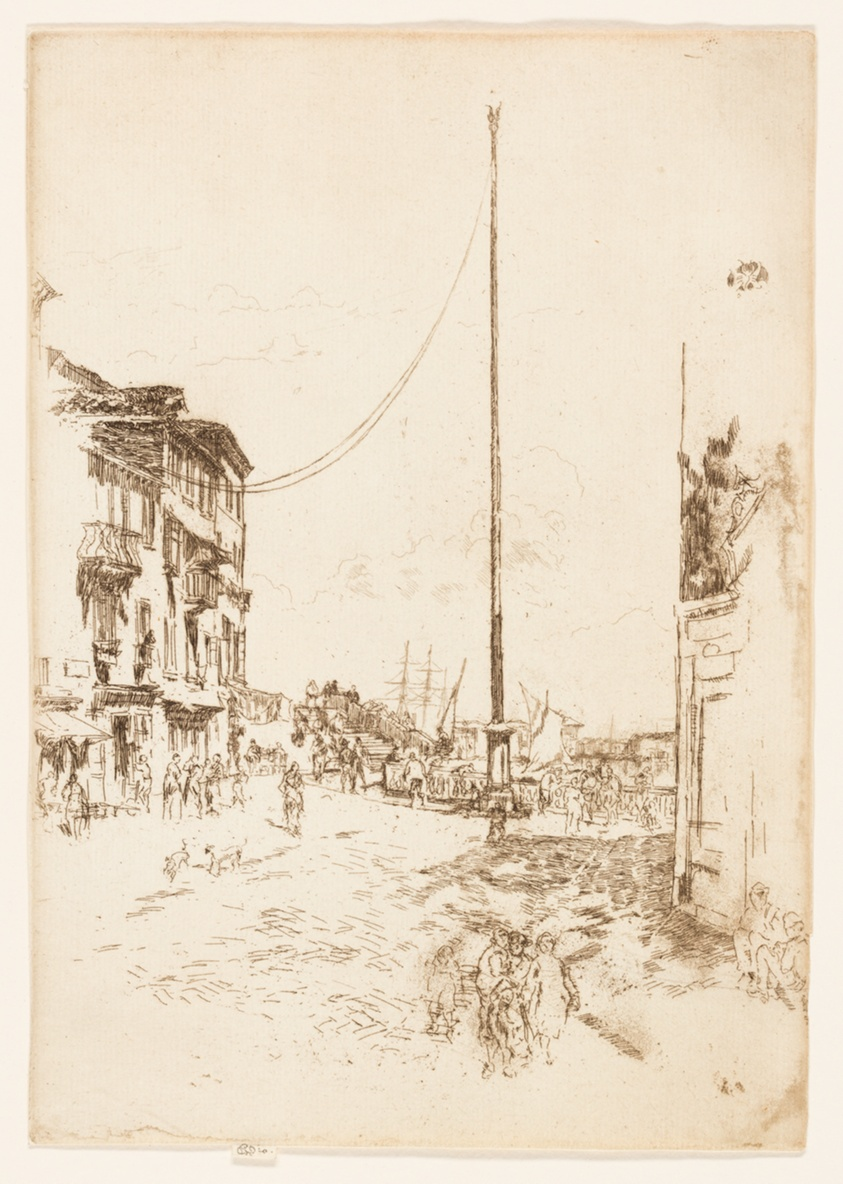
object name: Print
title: The Little Mast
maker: James McNeill Whistler (American, 1834-1903)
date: 1879/80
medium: Etching and drypoint with foul biting in brown ink on ivory laid paper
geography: United States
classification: etching; drypoint; foul biting; print; prints and drawing; paper